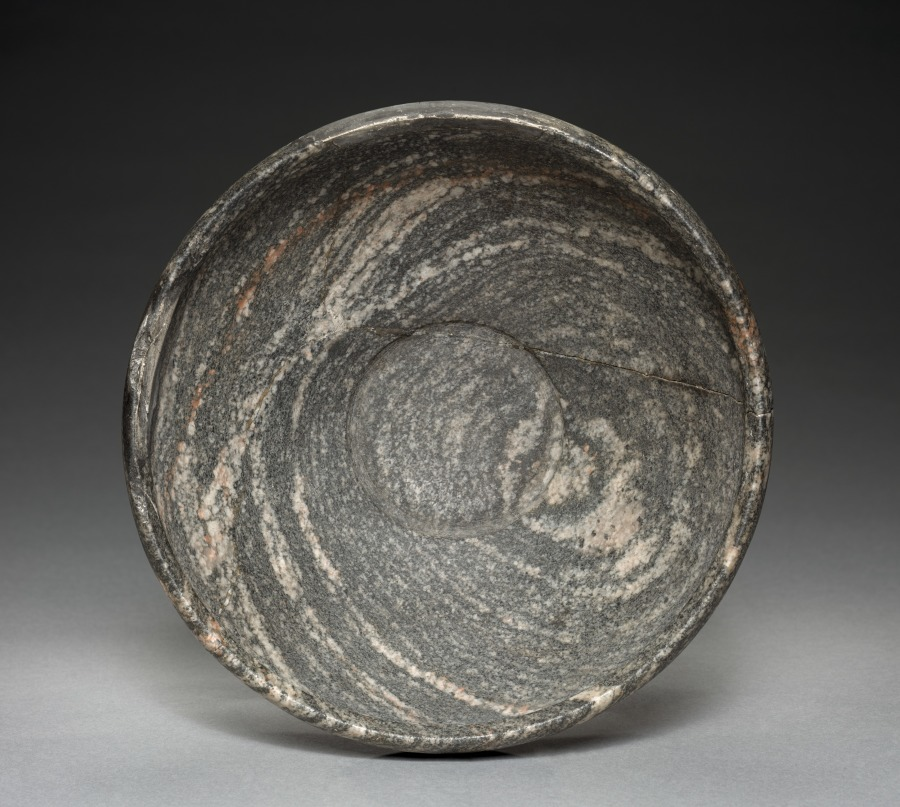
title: Bowl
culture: Egypt, Early Dynastic (2950–2647 BCE), Dynasty 2, reign of Nynetjer (c. 2700 BCE) or later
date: 2770–2647 BCE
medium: anorthosite gneiss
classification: Vessels